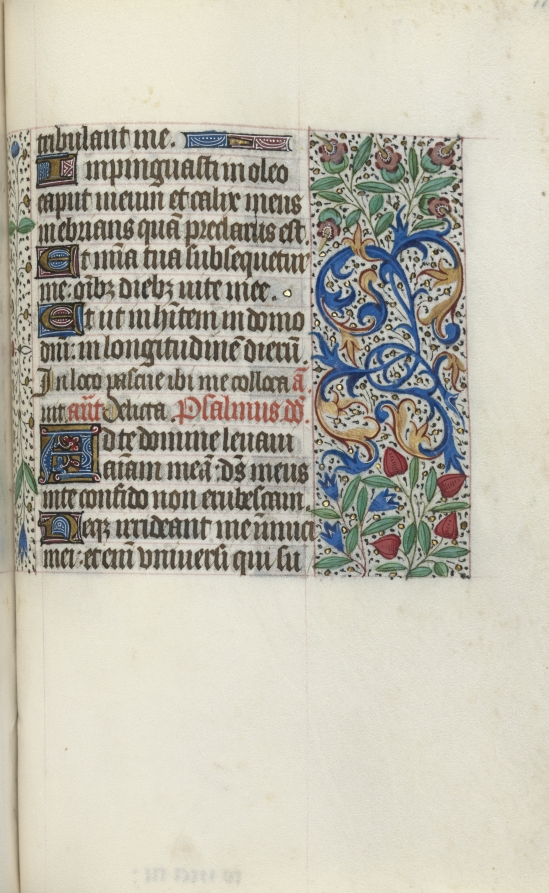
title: Book of Hours (Use of Rouen): fol. 118r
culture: France, Rouen, 15th century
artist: Master of the Geneva Latini (French, active Rouen, 1460–80)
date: c. 1470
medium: ink, tempera, and gold on vellum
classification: Bound Volume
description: In the late 1400s and early 1500s Rouen was an established and important center of book production. The city’s cathedral had a wealthy chapter that spent large sums of money to commission books and to maintain its extensive library. The stationers and booksellers would have likely been concentrated in or near the cathedral precinct. This artist, named after a manuscript now in Geneva, was Rouen’s principal illuminator during the second half of the 1400s.